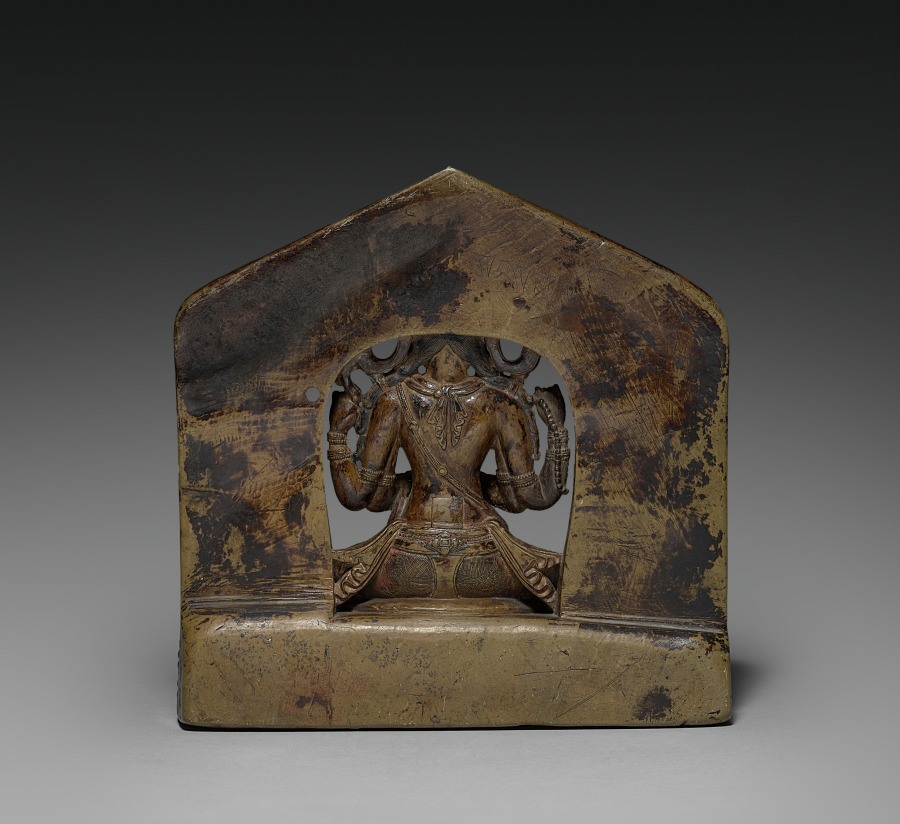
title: Stele with Sadaksari-Lokesvara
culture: Tibet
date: c. 1200s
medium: Kaolin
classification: Sculpture